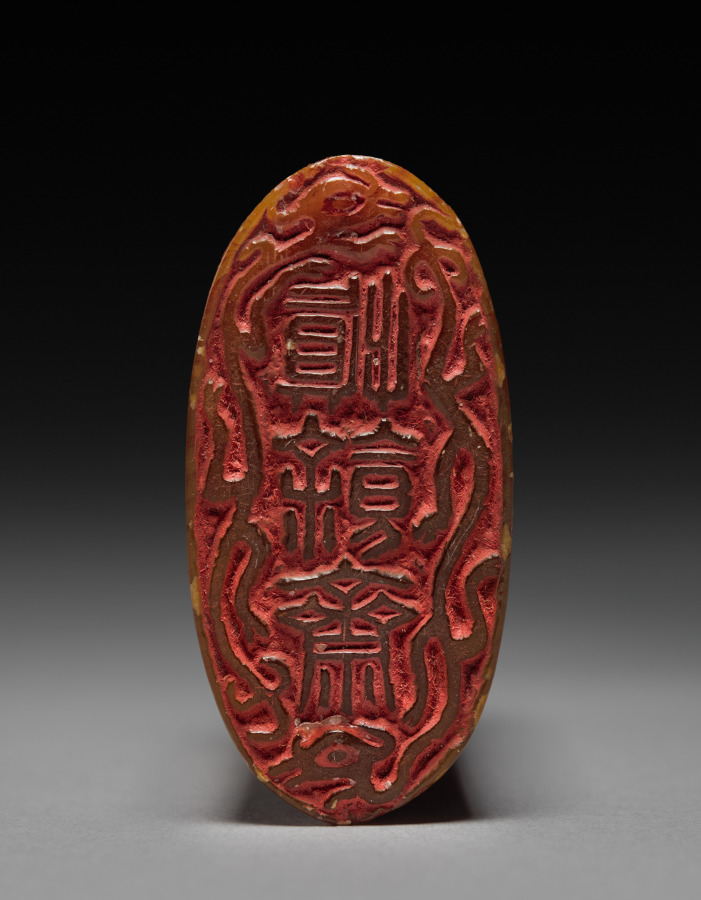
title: Seal with Reclining Qilin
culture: China, Qing dynasty (1644–1911), Qianlong reign (1736–95)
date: 1736–95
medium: tianhuang stone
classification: Stone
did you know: The elliptical seal has three characters in archaic script enclosed by two dragons.